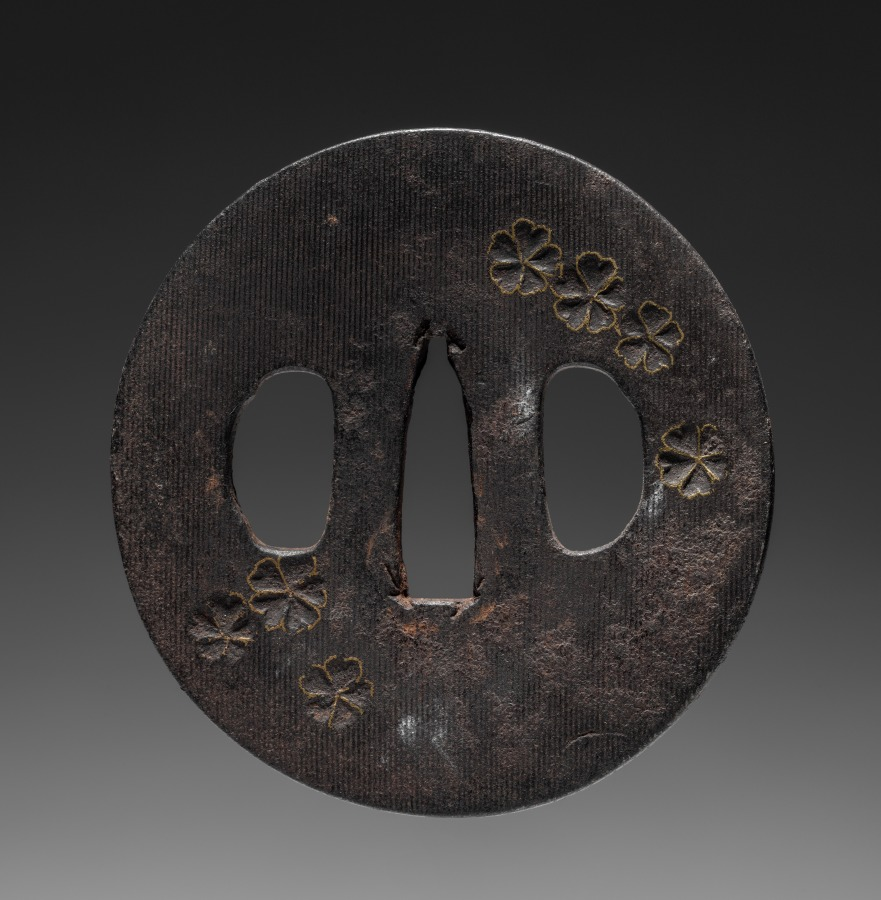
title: Sword Guard (Tsuba) with Cherry Blossoms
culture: Japan, possibly Edo period (1615–1868)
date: c. 1615–1868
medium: metal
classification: Arms and Armor